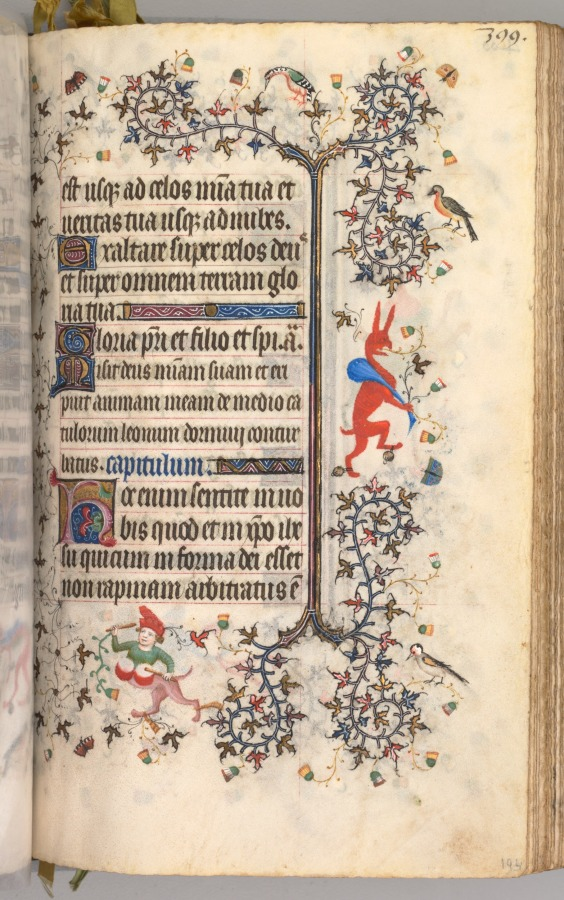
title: Hours of Charles the Noble, King of Navarre (1361-1425): fol. 194r, Text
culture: France, Paris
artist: Master of the Brussels Initials and Associates (French)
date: c. 1405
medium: ink, tempera, and gold on vellum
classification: Bound Volume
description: This precious volume was obviously highly prized by its owner, the French-born King of Navarre, who had his coat of arms painted on no less than twenty folios. Rather than directly commissioning this manuscript from a specific workshop, it seems that Charles the Noble acquired his book of hours -- perhaps ready-made for the luxury market -- while on a trip to Paris in 1404-05. A collaborative effort, six painting styles are evidenced within the pages of this codex, those of two Italians, two Frenchmen, and two Netherlanders. The painter who was responsible for the planning and decoration of the book, and who produced seventeen of the large miniatures, was a Bolognese artist known as the Master of the Brussels Initials. His principal assistant, responsible for most of the borders, was a Florentine who signed his name "Zecho" da Firenze on folio 208 verso.